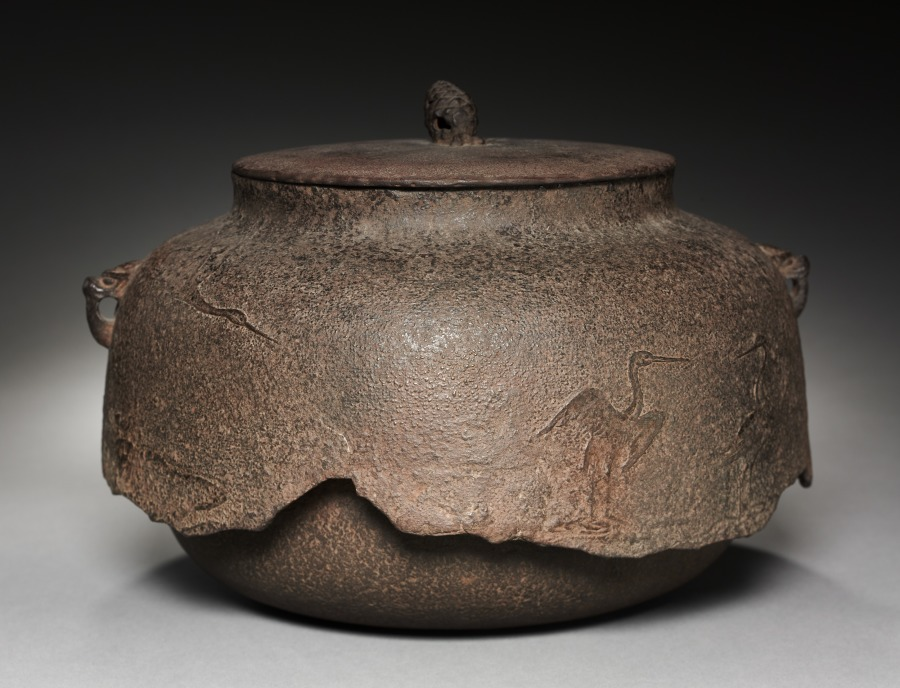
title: Kettle with Crane Design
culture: Japan, Muromachi period (1392–1573)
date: 1392–1573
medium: iron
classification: Metalwork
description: Water supplied from a jar such as the fine Shino-ware vessel (CMA 1972.9.a-b) was transferred to an iron kettle for boiling as part of the tea ceremony. Former CMA director Sherman Lee described the jagged, broken skirt of this kettle as "attractively damaged," complementing the unobtrusive wispy designs on its rough metal surface. The character of this kettle—worn, coarse, the "perfection" of symmetry destroyed—was cherished by tea masters for its powerful humility.